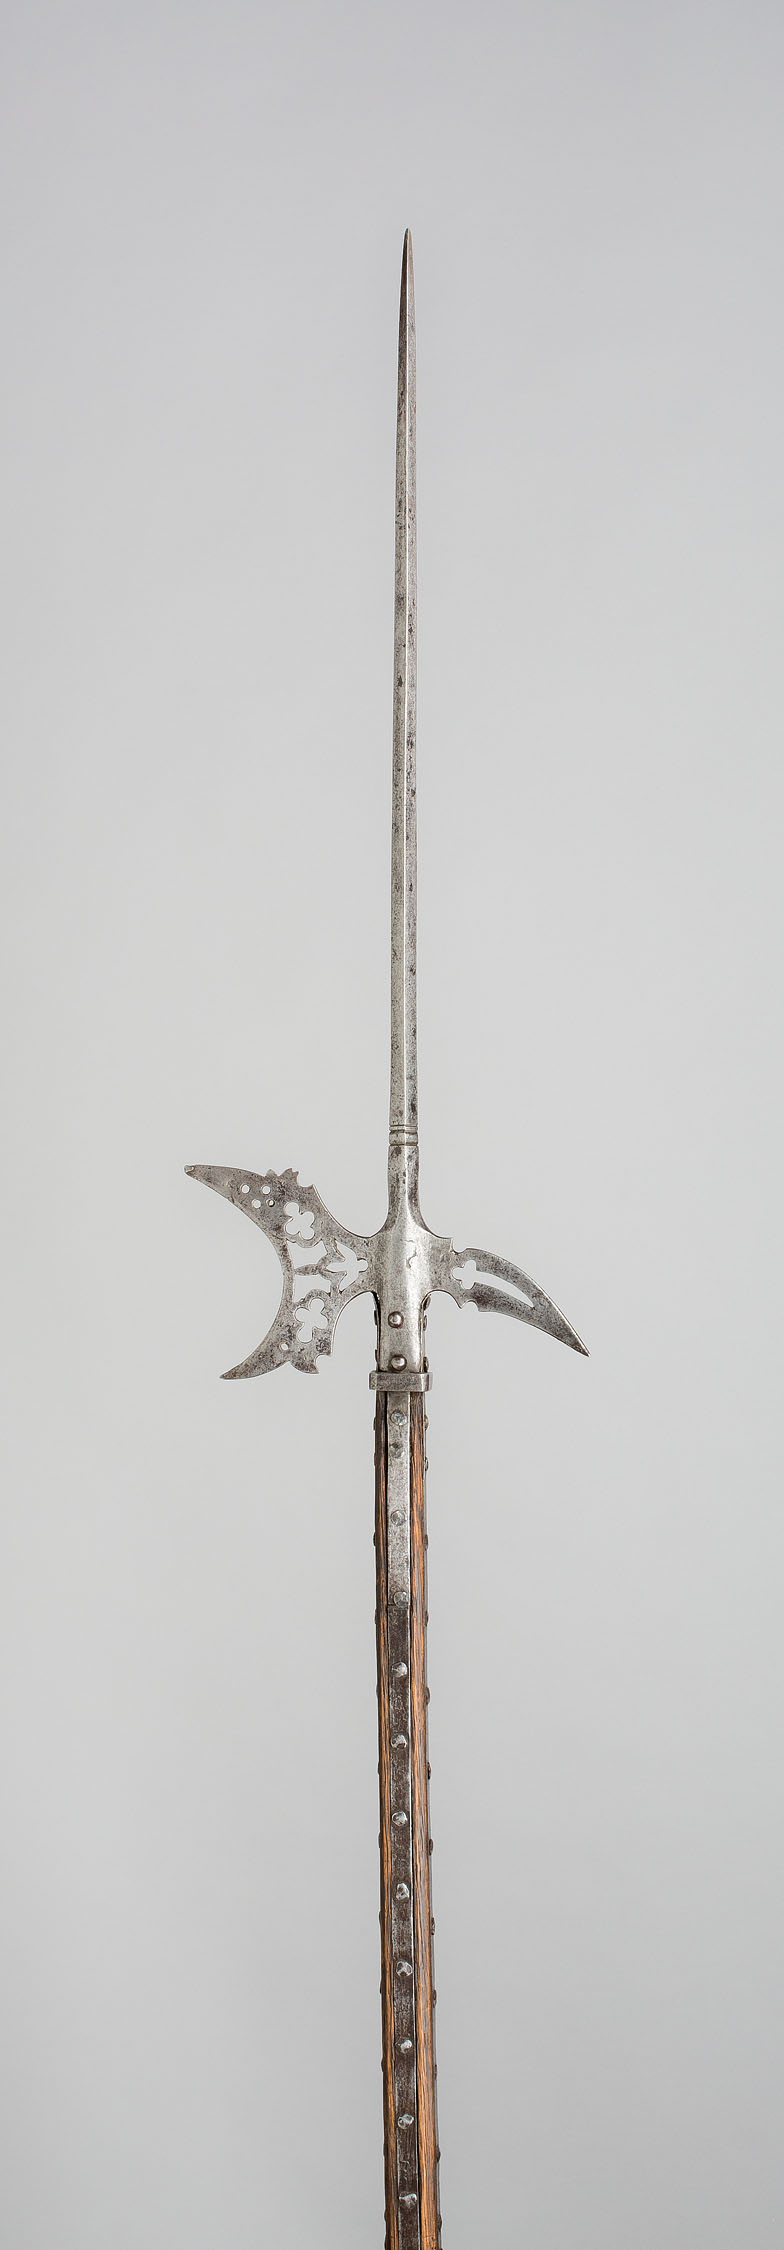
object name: Arms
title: Halberd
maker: German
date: 1575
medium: Steel and wood (oak)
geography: Germany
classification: edged weapon-staff; arms; arms and armor